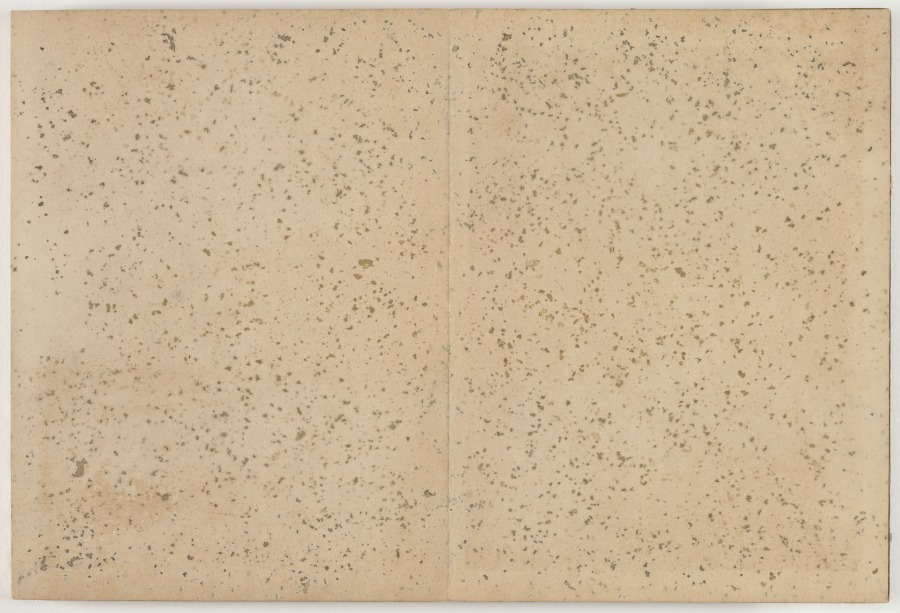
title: Flowers of a Hundred Worlds (Momoyogusa), Vol. 1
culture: Japan, Meiji period (1868–1912)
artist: Kamisaka Sekka (Japanese, 1866–1942)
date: 1909–10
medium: one of a set of three woodblock-printed folding-books; ink, color, gold, and silver on paper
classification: Bound Volume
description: This is the first of a set of three woodblock printed albums by Kamisaka Sekka, the artist considered the last major exponent of the Rinpa style of painting and design associated with the artists Tawaraya Sōtatsu (died about 1640) and Ogata Kōrin (1658-1716). Momoyogusa, in addition to meaning "flowers of a hundred worlds," is a classical name for the chrysanthemum. It appears in a poem by Mimube no Tarukuni (dates unknown) written in 755 and contained in the first Japanese imperial poetry anthology, Collection of Ten Thousand Leaves (Man'yōshū). In the poem, Tarukuni, who was posted in northern Kyushu as a guard at the time, asked a missed beloved in his home province to be well for a hundred nights, like the chrysanthemums growing in his parents' garden. Chrysanthemums are traditionally associated with longevity, and in some cases immortality. This volume of Sekka's series includes a preface poem by the Kyoto-based physician and poet Sugawa Nobuyuki (1839-1917) that may be glossed as follows: As we move forward in the spirit of the new age, "flowers of a hundred worlds" sown by seed, now blossom in distinctive colors and scents (translation by John T. Carpenter)